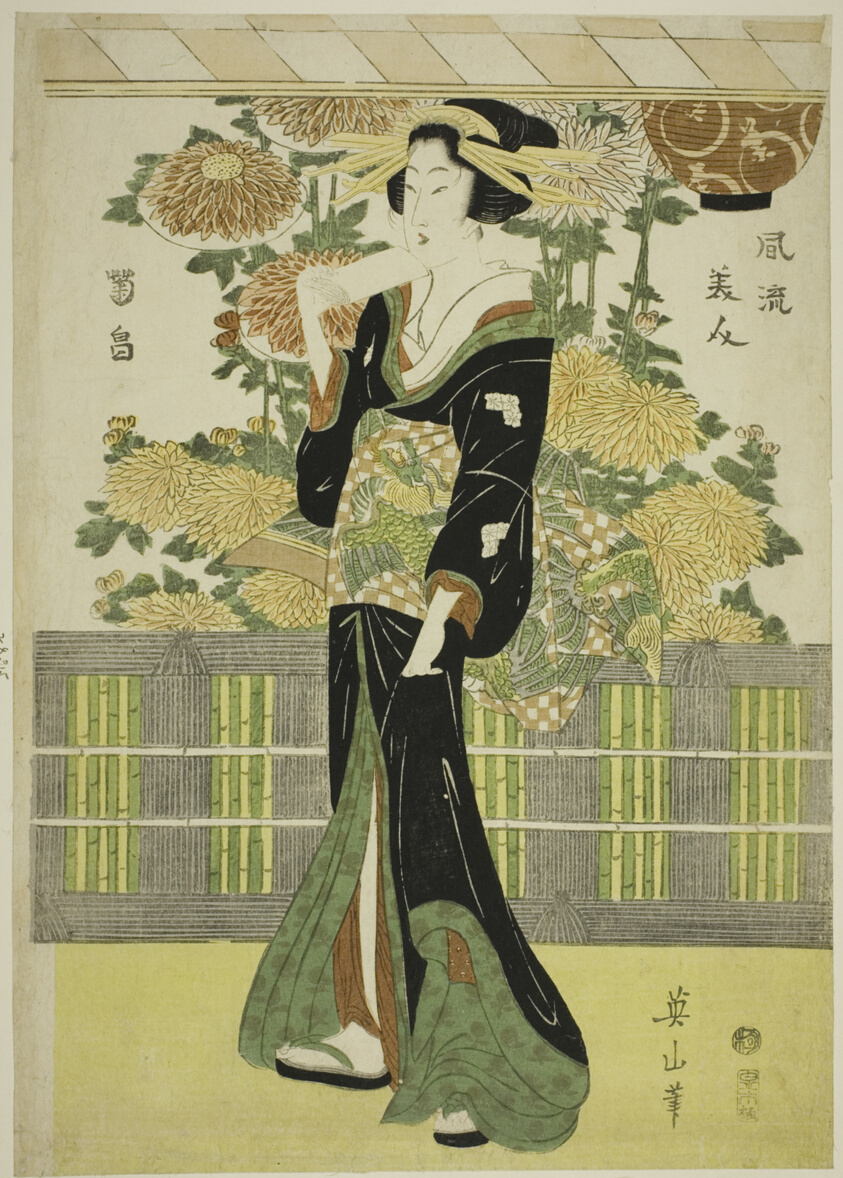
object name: Print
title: Fashionable Beauties in a Chrysanthemum Garden (Furyu bijin kikubatake)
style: Japanese (culture or style)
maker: Kikukawa Eizan (Japanese, 1787-1867)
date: c. 1810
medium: Color woodblock print; right sheet of oban triptych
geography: Japan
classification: woodblock print; print; asian art